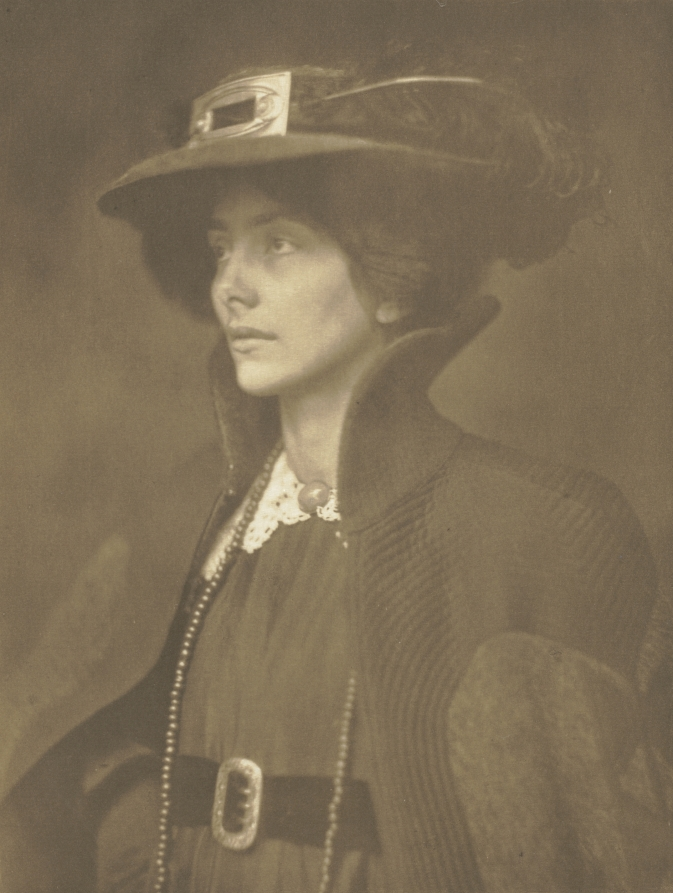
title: Camera Work: Frau Mathasius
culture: England, 20th century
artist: J. Craig Annan (British, 1864–1946)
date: 1904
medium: photogravure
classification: Bound Volume